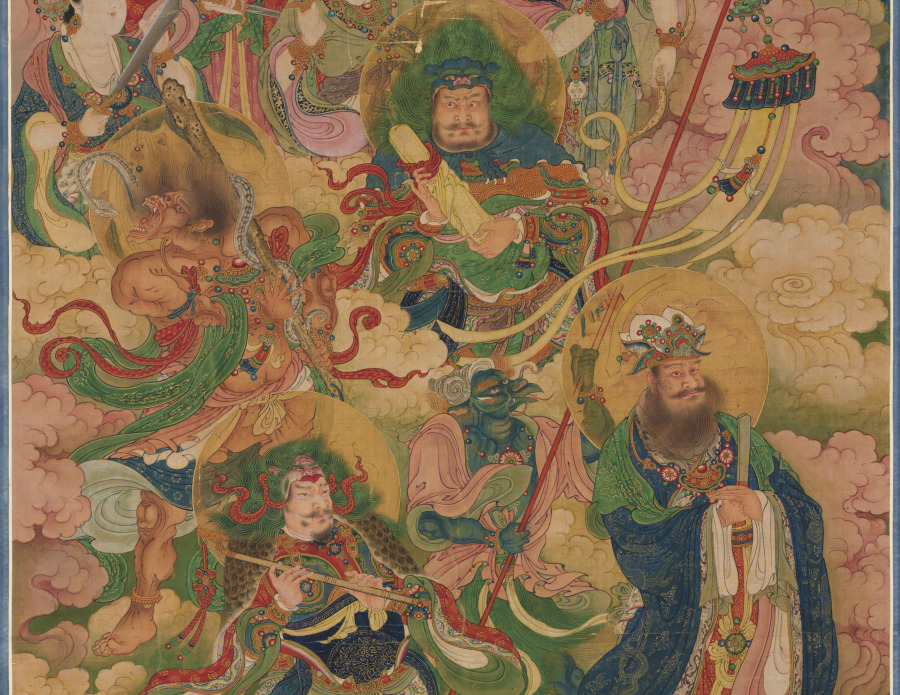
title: The Eight Hosts of Deva, Naga, and Yakshi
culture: China, Ming dynasty (1368–1644)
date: 1454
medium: hanging scroll; ink and color on silk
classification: Painting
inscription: 大明景泰五年八月初三日施 [印] 廣運之寳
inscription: 御用監太監尚義王勤等奉命提督監造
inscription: 天龍八部羅叉女衆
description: The grandest of the Buddhist mortuary rites is the Water-Land (shuilu) ritual. This esoteric ceremony is conducted for the salvation of “all souls of the dead on land and sea.” The ostentatious ritual was performed for imperial ancestors and high officials from the Song (960–1279) to the Ming dynasties and drew large crowds. On the second day of the weeklong ceremony, paintings are hung in the inner altar. This scroll represents the Eight Hosts of Celestial Nagas and Yakshis as described in the Lotus Sutra. Together with CMA 1973.70.1, it belongs to a set of 36 Water-Land ritual paintings that are the finest works of their types known from the Ming period. With their bright, opaque color and fine-line gilt decoration intact and unfaded, both paintings share a remarkable state of preservation.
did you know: The Naga is on the lower right dressed as a king with gold dragons on his blue robe.